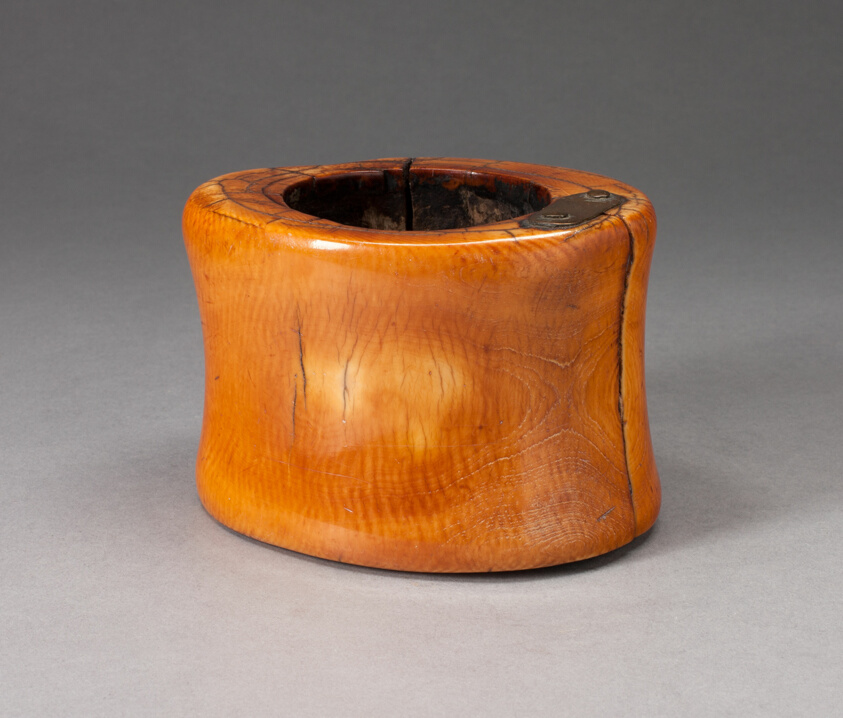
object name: Costume and Accessories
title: Four Bracelets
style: igbo, Arts of Africa, african Art, Coastal West Africa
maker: Igbo; Nigeria; Coastal West Africa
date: Probably 19th century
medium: Ivory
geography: Nigeria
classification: bracelet (jewelry); ivory; jewelry; arts of Africa; african art; costume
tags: costume